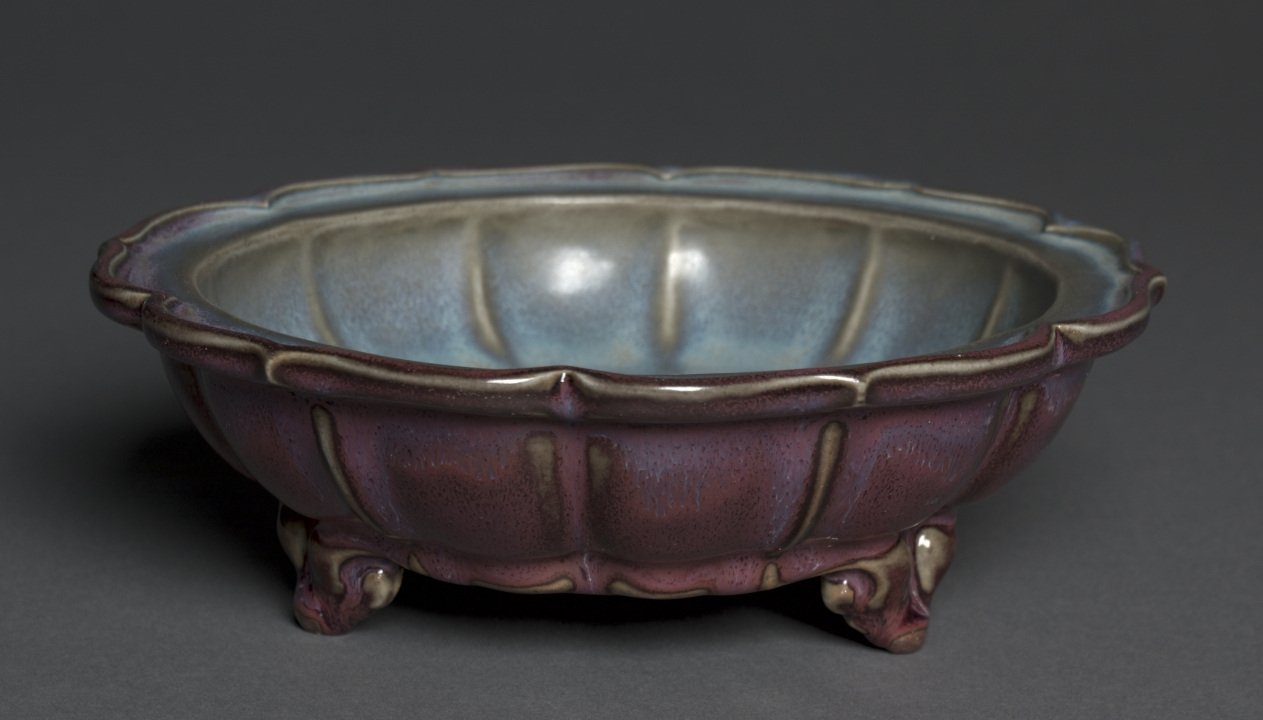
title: Bulb Bowl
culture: China, Henan Province, Yuxian, Juntai, Ming dynasty (1368–1644)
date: early 1400s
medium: porcelaneous stoneware, numbered Jun ware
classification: Ceramic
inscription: 二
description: Numbered Jun ware is inscribed with a number on its bottom—in this case number "two"—and is thought to have been made initially for the early Ming imperial court. The number indicates size, with "one" being the largest and "ten" being the smallest. Another characteristic is the "earthworm trail" left on the glaze surface, seen on the interior of this bulb bowl, where the opalescent blue glaze has cracked in several places during firing. The rich purplish tone on the exterior is the result of using copper pigment in the glaze.